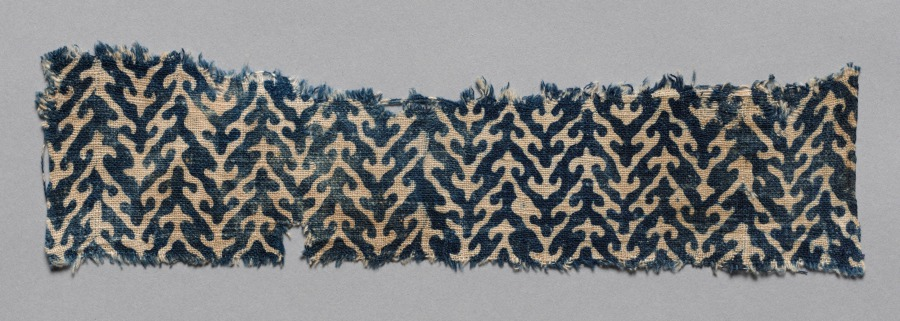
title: Fragment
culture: India, 12th-14th century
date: 1100s - 1300s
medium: plain cloth, resist dyed; cotton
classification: Textile